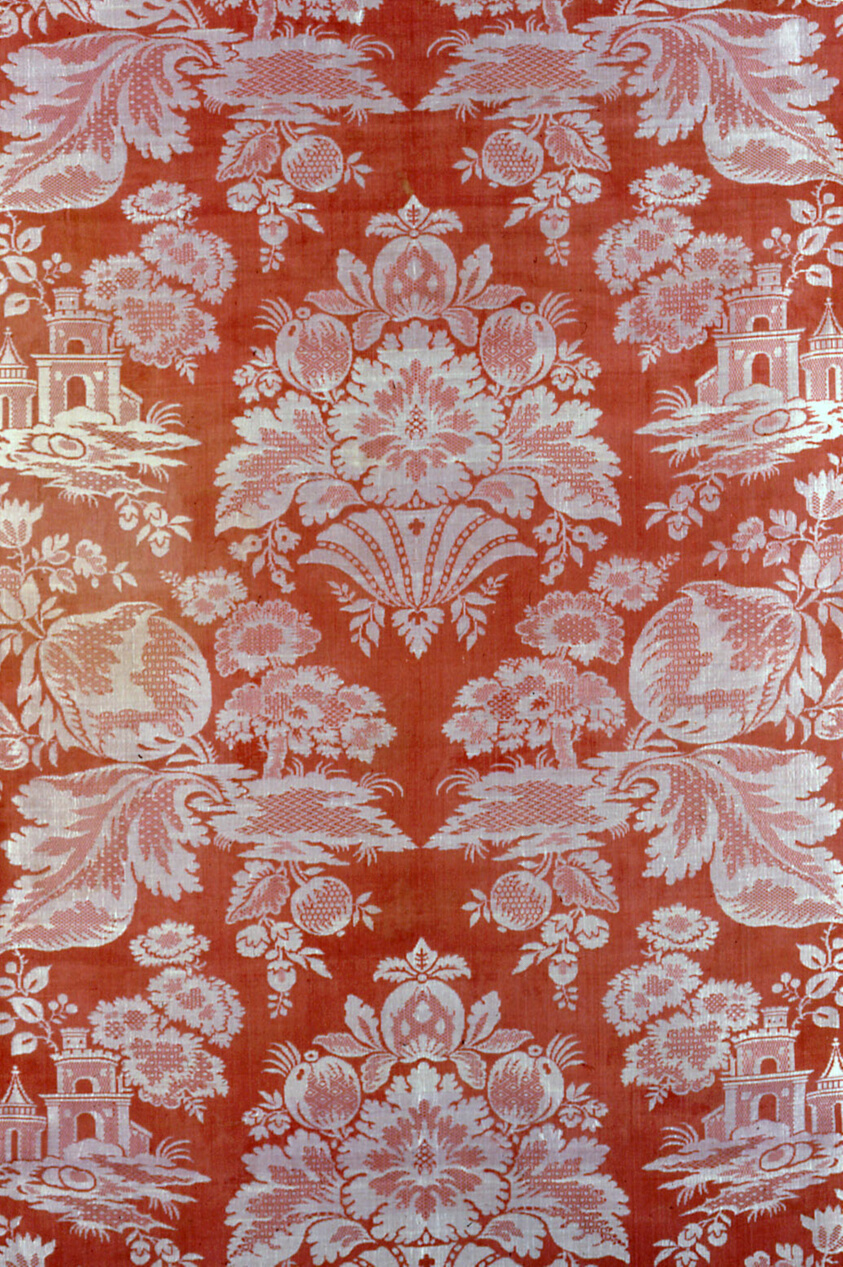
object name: Textile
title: Panel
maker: France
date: c. 1740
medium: Silk, plain weave with supplementary patterning wefts tied by supplementary binding in plain interlacings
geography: France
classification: textile; weaving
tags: Floating Gardens, foliage, fruit